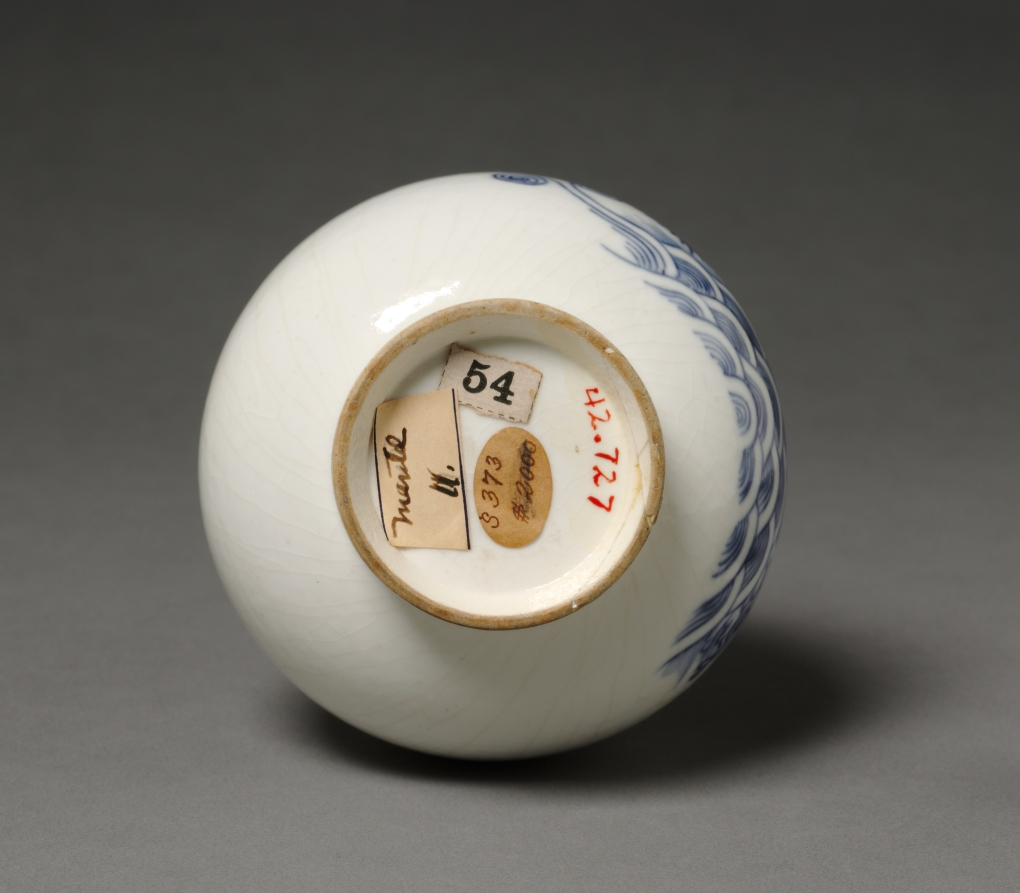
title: Pear-Shaped Vase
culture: China, Jiangxi province, Jingdezhen kilns, Qing dynasty (1644-1911), Yongzheng reign (1723-35)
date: 1723–35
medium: porcelain with underglaze blue decoration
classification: Ceramic